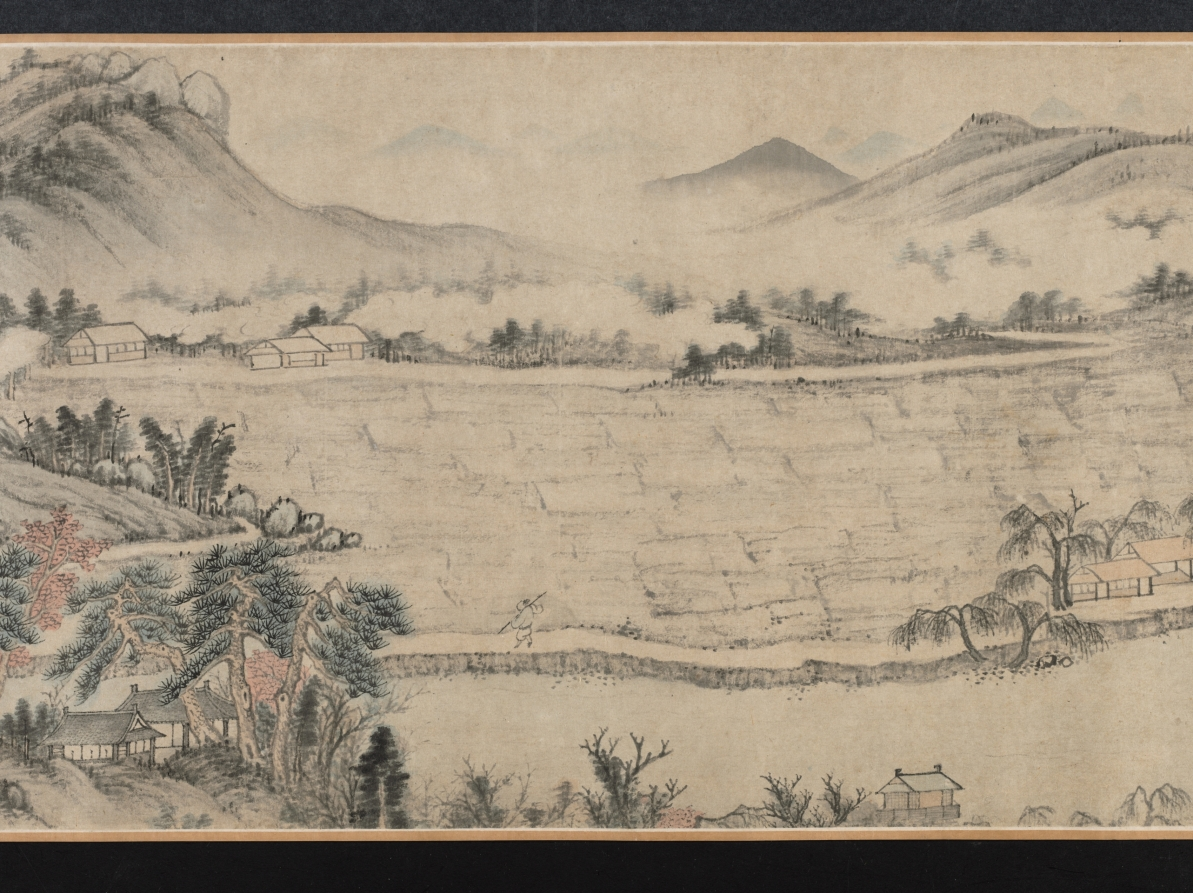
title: Mt. Taibo in the Style of Wang Meng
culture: China, Ming dynasty (1368–1644)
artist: Du Qiong (Chinese, 1396–1474)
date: 1442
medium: handscroll; ink and light color on paper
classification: Painting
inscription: Artist's inscription, signature, and 11 seals: [1 seal] Tung-yüan chai. Huang-ho-shan-ch'iao [Wang Meng] painted a painted called T'ai-po Mountain. Its brushwork is superior and admirable, which is very close to Yu-ch'en [Wang Wei, 699-759]. The cleverness of its composition, the maple groves and rustic temples, the inaccessible ravines and autumnal plateaus, the periolous peaks and strange rocks, etc., all seem to be so natural. The paper is only a little over eight feet, but the landscape has the range of a thousand miles. Once you open and note the contents, it is as if one were roaming among the mountain peaks enveloped in mist and clouds, and forgot the dusty world. When I first saw this, I was so mixed with excitement and joy that I could not take my hands off the painting. So I put it on the table, and tried my best to imitate it, forgetting sleeping and eating for about three months before it was completed. Although I do not dare to tread in the footsteps of Huang-ho shan ch'iao, I took great pains to capture his spirit in composition and colors. I do not know whether it would pass the judgment of the experts. On the fifteenth day of the fifth month, the seventh year of the Cheng-t'ung year [1442], inscribed by Tung-yüan, Tu Chiung. [2 seals] Yung-chia; Ching-chieh ming-men. [8 seals on painting] Tung-yüan chai; Ching-chieh ming-men; Yung-chia; Tu Ch'iung yin; Tung-yüan (repeated 5 times). trans. WKH/LYSL 3 colophons and 7 additional seals: 1 colophon and 2 seals of Chou Ting (1401-1487); 1 colophon and 2 seals of Wu K'uan (1435-1504); 1 colophon, dated 1655, and 2 seals of Lan Ying (1585-after 1664).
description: When a Chinese painter "imitated" a painting by a past master, the intention was never to produce an exact copy. Du Qiong, the Ming painter from Suzhou, is a case in point. The painting style of this handscroll is actually closer to that of Huang Gongwang (1269–1354) than to the style of Wang Meng (about 1301–1385). Both masters were active during the previous dynasty and are among the so-called Four Great Masters of the Yuan dynasty (1279–1368). In this painting, the interplay of styles, including Du Qiong's own, contribute to an inner dimension that is more than visual. Mt. Taibo is located in the province of Zhejiang and is known for its scenic beauty. In this scroll, however, it is not depicted literally. The image is an ideal representation of mountains in southeastern China.